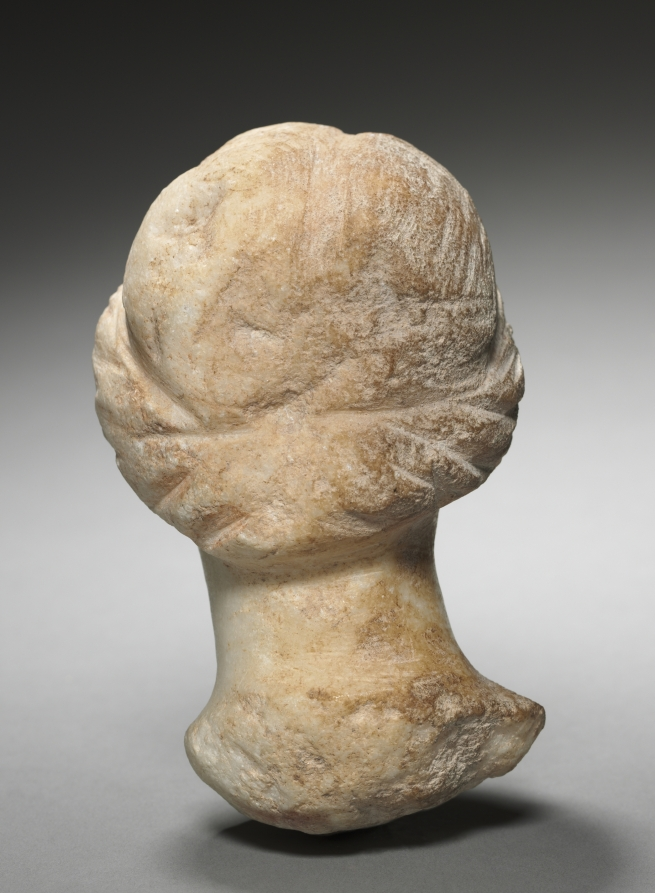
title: Head of a Woman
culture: Greece, Hellenistic period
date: 300–200 BCE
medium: marble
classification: Sculpture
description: The symmetry and proportions of this unidentified woman's portrait harkens back to the classical style made popular in the 4th century BC by the master Greek sculptors Praxiteles and Lysippos. Her center-parted wavy hair, rolled into an up-do, reflects the style of the later Hellenistic period when this work was made.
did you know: This hairstyle was achieved by rolling the hair and tucking it into the band behind the ears.